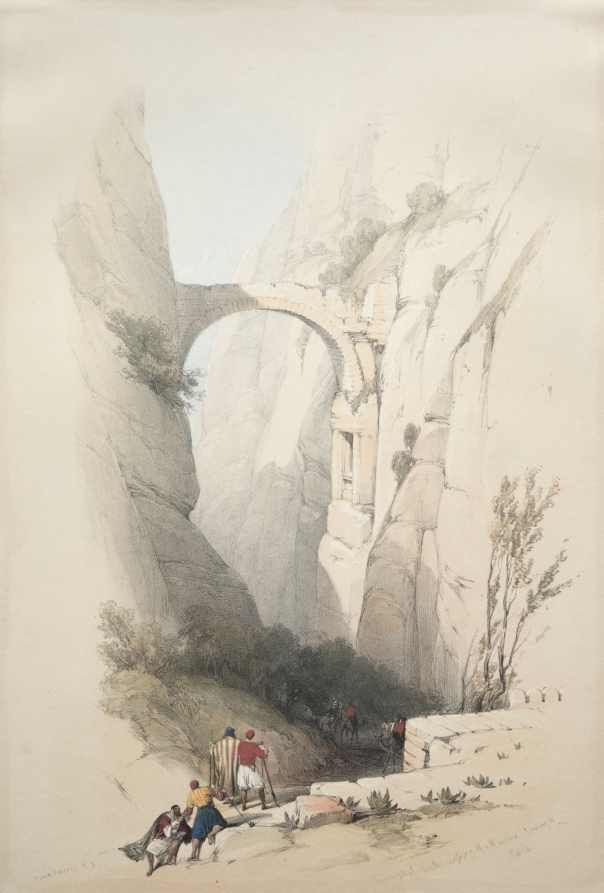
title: Triumphal Arch Crossing the Ravine Leading to Petra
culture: England, 19th century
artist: David Roberts (Scottish, 1796–1864)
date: 1839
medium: color lithograph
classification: Print